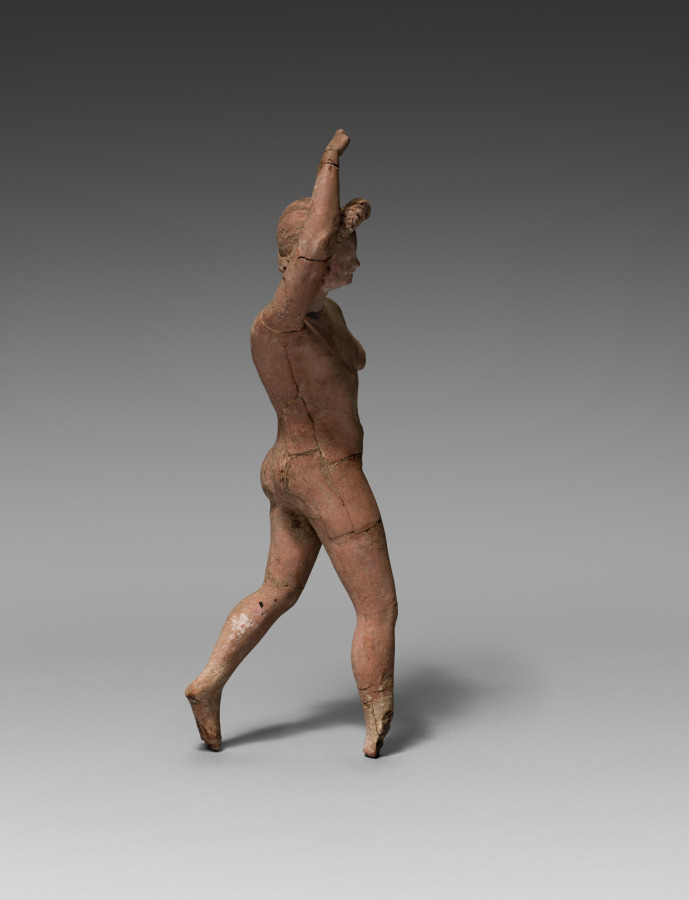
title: Dancing Eros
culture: Anatolia, Myrina, Greece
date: 300–200 BCE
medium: terracotta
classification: Sculpture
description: The region of Myrina in Asia Minor (now part of modern Turkey) is known for its abundance of ancient terracotta figurines. Eros, the Greek god of love, was especially popular. Here he is depicted as a nude youth, not a small child. Eros’ extra-long legs and arms, though only partially preserved, are thrown about in a carefree dance. He wears a celebratory floral crown atop his long curls. Once probably fully painted, only traces of red pigment survive on the face. A figurine like this one may have been a votive or offering of thanks to Eros or Aphrodite, his mother, also a goddess of love, for a successful marriage.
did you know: Figurines of Eros are often paired with figurines of his mythological wife, Psyche.